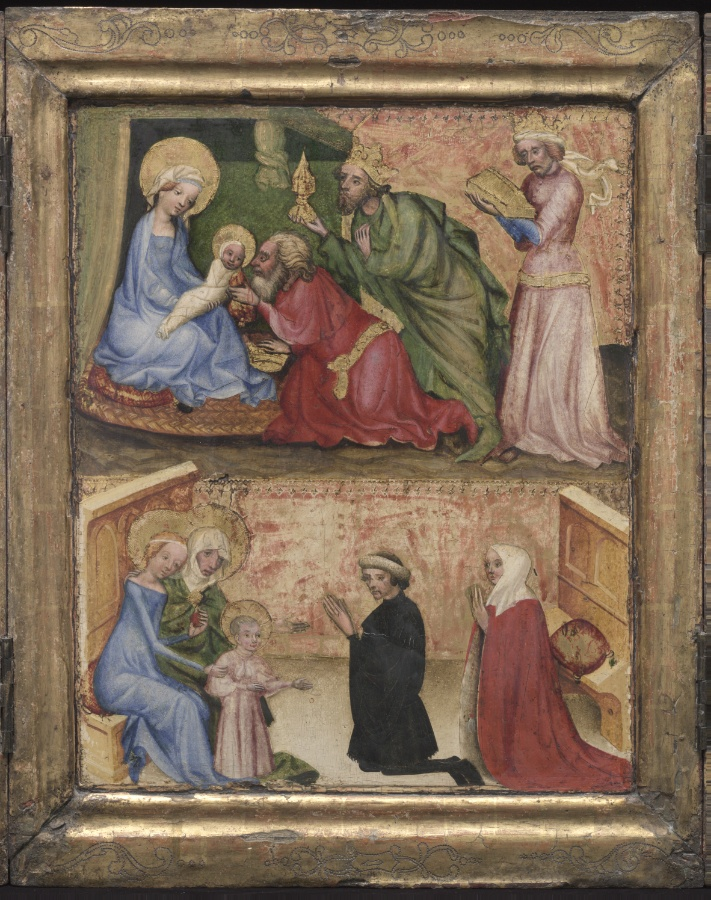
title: The Adoration of the Magi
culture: Austria, Salzburg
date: c. 1424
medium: tempera and gold on wood (oak)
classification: Painting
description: This small winged altarpiece, called a triptych, was undoubtedly made for private use. The donor and his wife are shown in the lower central scene kneeling before the Virgin, her mother Saint Anne, and the Christ child. Above is the Epiphany with the Three Kings presenting gifts to a tightly swaddled Christ.